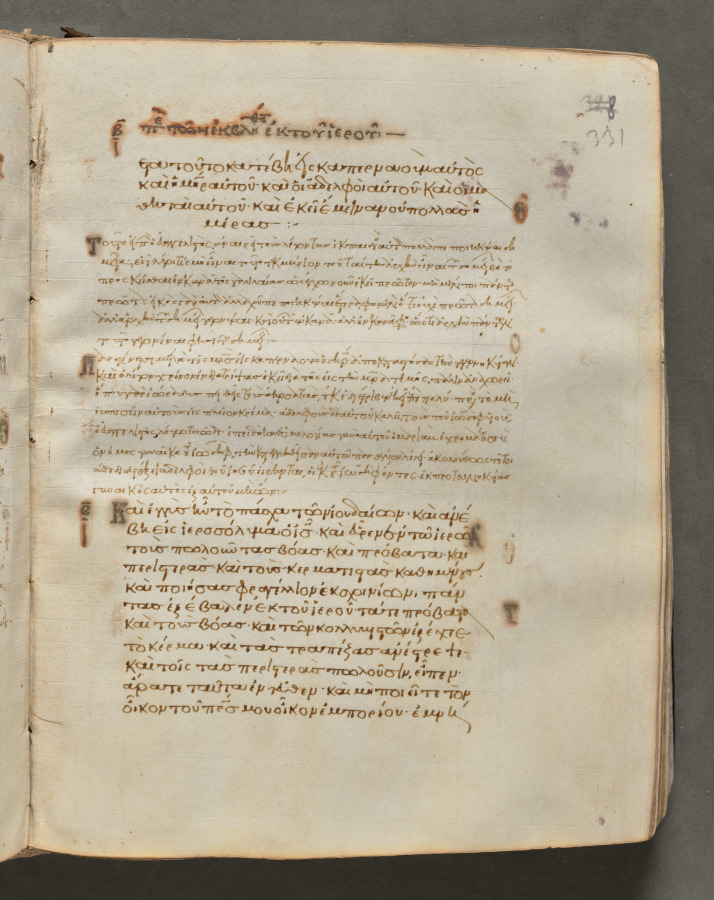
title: Text, folio 331 (recto), from a Gospel Book with Commentaries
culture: Byzantium, Constantinople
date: c. 1000–1100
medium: ink, tempera, and gold on vellum; leather binding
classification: Bound Volume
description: Each of the four gospels in this book opens on a page with brilliantly illuminated borders depicting the author of the text as well as birds—principally peacocks, symbols of the immortality of the soul—and fountains, representing the fountain of life and the salvation of the soul. This volume consists of 428 leaves with texts in Greek. Its level of sophistication suggests that it was probably written and decorated in a monastery in Constantinople.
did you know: Gospel books were carried in procession through Byzantine churches.